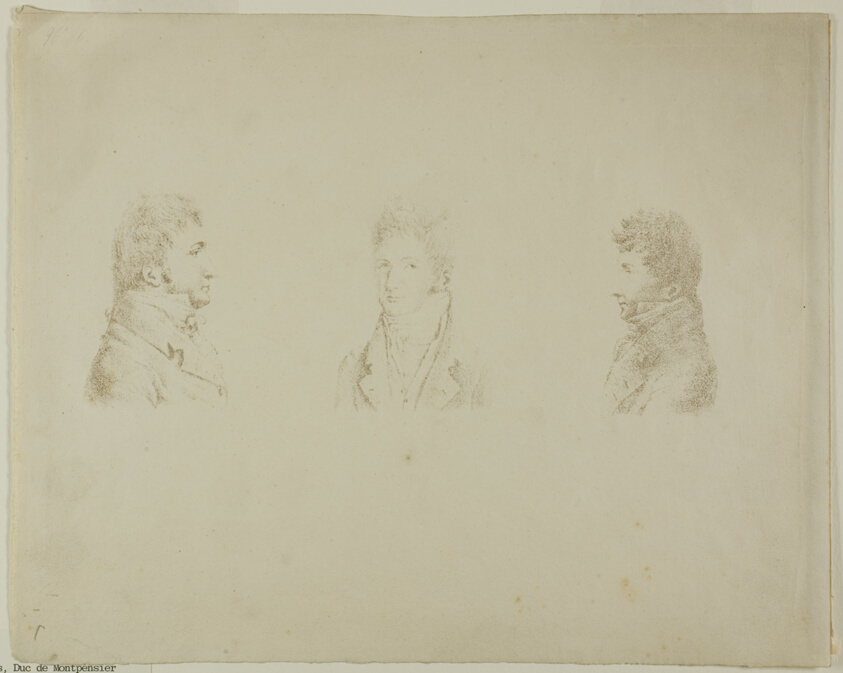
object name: Print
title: Bust Portraits of Three Brothers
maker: Antoine Philippe d'Orléans (French, 1775-1807)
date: 1805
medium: Lithograph stippled in brown on cream wove paper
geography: France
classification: lithograph; print; prints and drawing